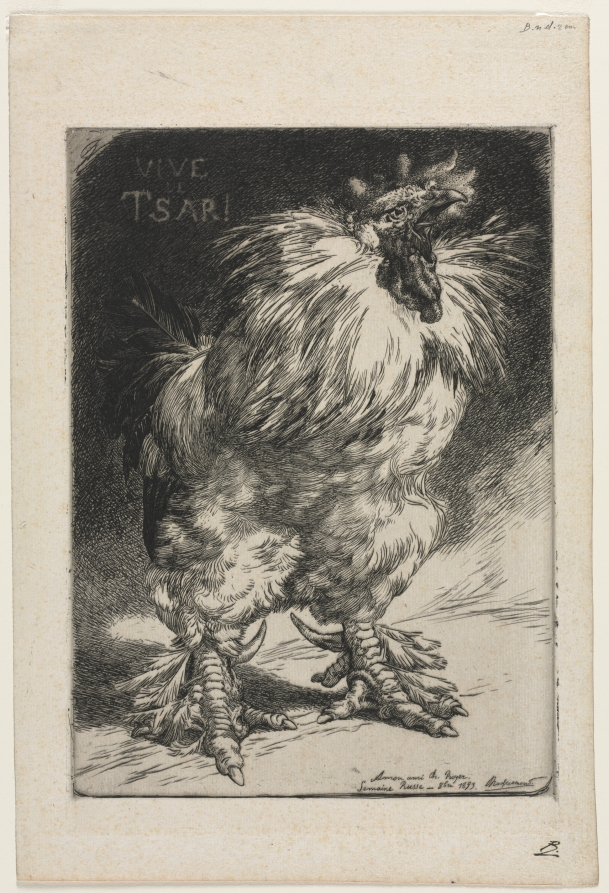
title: The French Cock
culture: France, 19th century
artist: Félix Bracquemond (French, 1833–1914)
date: 1893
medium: etching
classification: Print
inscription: printed in the plate, lower right: À mon ami Ch. Royer, Semaine russe --8 bre 1893. Braquemond